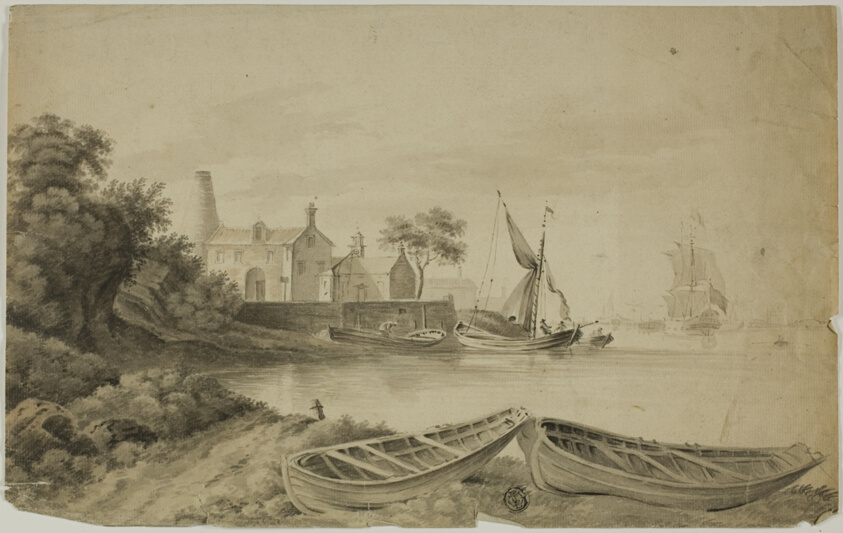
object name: Drawing and Watercolor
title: Small Dutch Port with Shipping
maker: Unknown Artist; Dutch, 1700-1799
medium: Brush and black and gray wash, with touches of red chalk, on cream laid paper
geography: Holland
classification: ink or chalk wash; drawings (visual works); prints and drawing